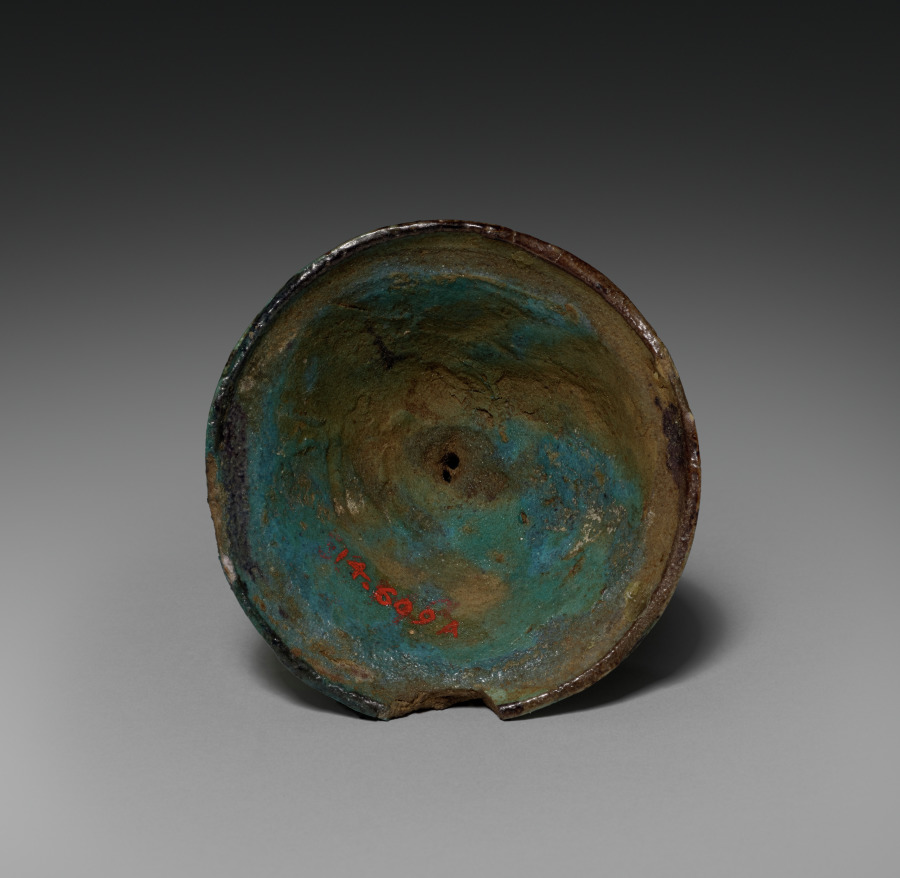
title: Pyxis with Lid (lid)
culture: Egypt, Middle Kingdom (2040–1648 BCE)–New Kingdom (1540–1069 BCE)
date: c. 1901–1525 BCE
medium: turquoise faience with black decoration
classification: Vessels